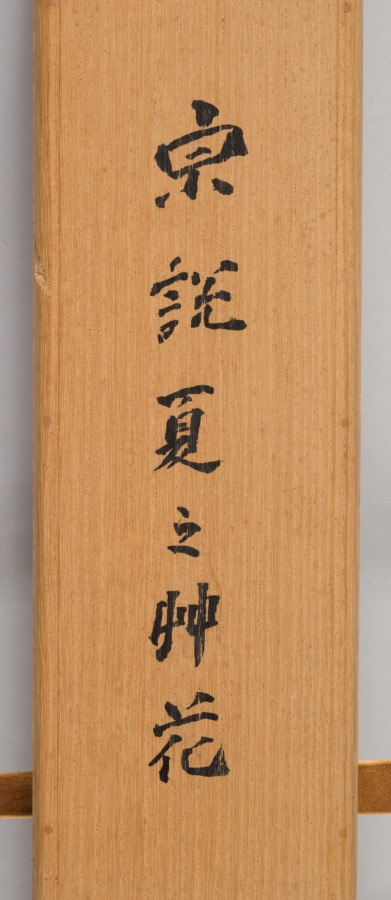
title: Summer Flowers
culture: Japan, Edo period (1615–1868)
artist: Kitagawa Sōsetsu (Japanese, active 1639–50)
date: mid-1600s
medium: hanging scroll; ink, color, and gold on paper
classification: Painting